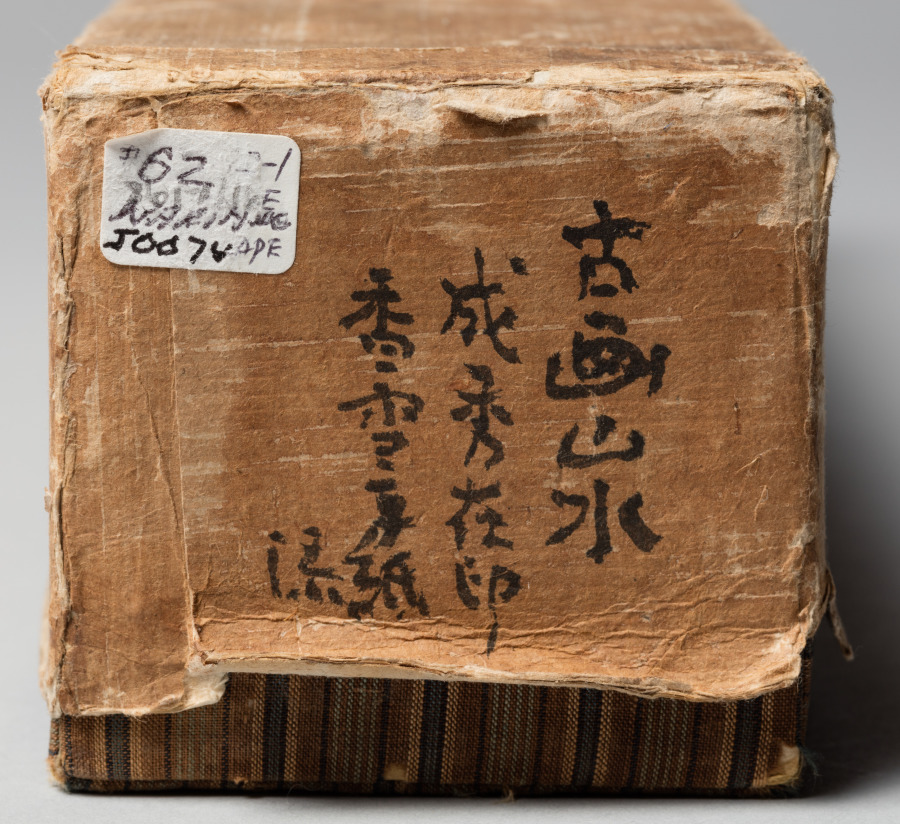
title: Landscape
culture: Japan, Muromachi period (1392–1573)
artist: Narihide (Japanese, active 1500s)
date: 1500s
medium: hanging scroll; ink on paper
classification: Painting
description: This composition includes imagery from the Eight Views of the Xiao and Xiang Rivers. Scanning the composition from top to bottom, at least six of the views are discernible: night rain over Xiao and Xiang, evening bell from a mist-shrouded temple, returning sails off a distant shore, geese descending to a sandbar, mountain village in clearing mist, and sunset glow over a fishing village. Inside the painting’s box is a document with a long inscription by prominent calligrapher, collector, and connoisseur Maeda Kōsetsu (1841–1916) discussing the painting’s subject and the matter of the painter’s biography—he appears to have been a Kano school artist, but his precise identity is unclear.